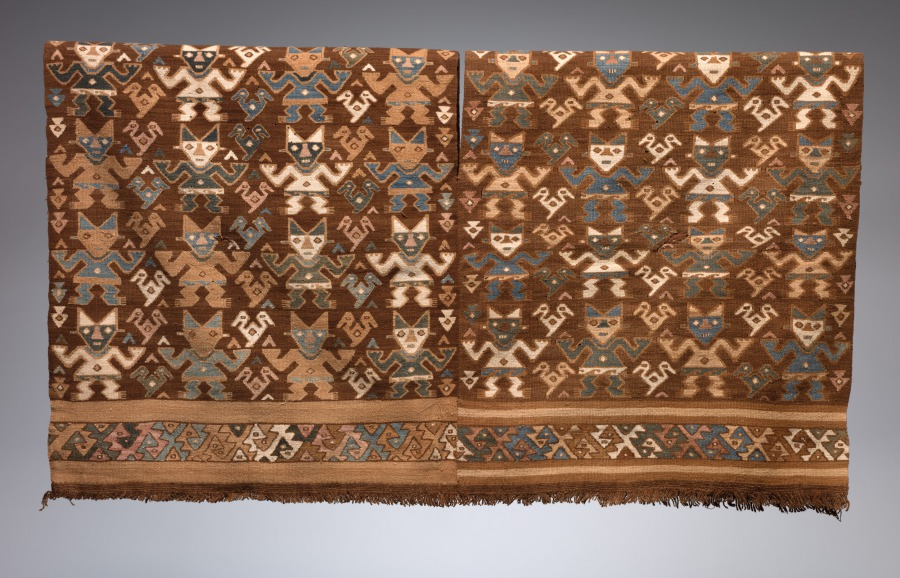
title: Tunic with Frontal Figures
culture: Central Andes, Central Coast, Ychsma (Pachacamac) people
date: 1400–1532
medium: Cotton; slit tapestry weave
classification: Textile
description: This tunic was made by weavers of the Ychsma (yeach-mah) people, who were affiliated with Pachacamac, a vast religious center that housed an oracle. The figures repeated across its composition may represent important ancestors or high-ranking members of society. The tunic likely dates to the period after the Inka Empire conquered Ychsma coastal territory, eventually becoming the largest Indigenous empire to have existed in the ancient Americas.